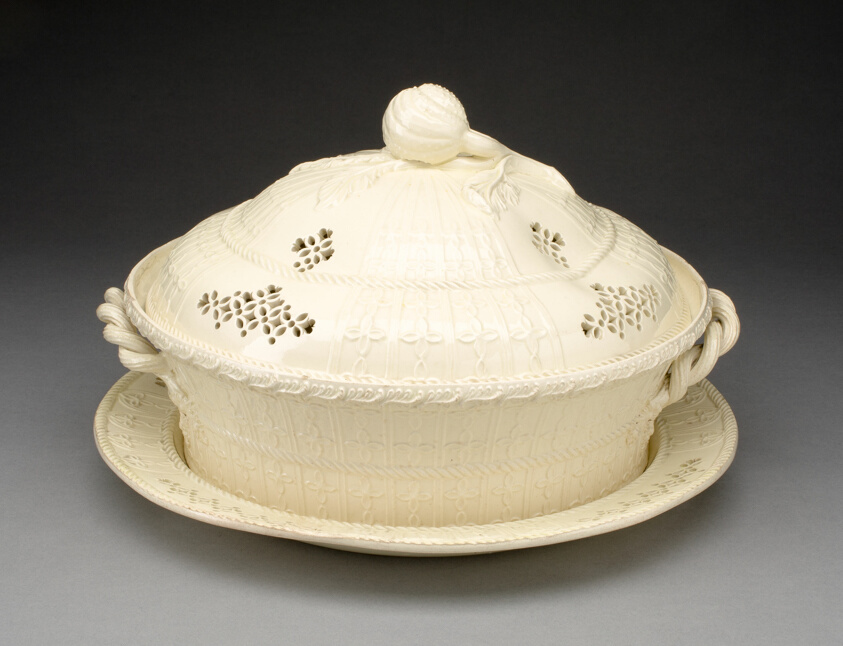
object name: Ceramics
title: Chestnut Basket and Stand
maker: Leeds Pottery; English, founded 1756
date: c. 1790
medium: Lead-glazed earthenware (creamware)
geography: Yorkshire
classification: tableware; earthenware; ceramics; european decorative arts; creamware; lead-glazed earthenware